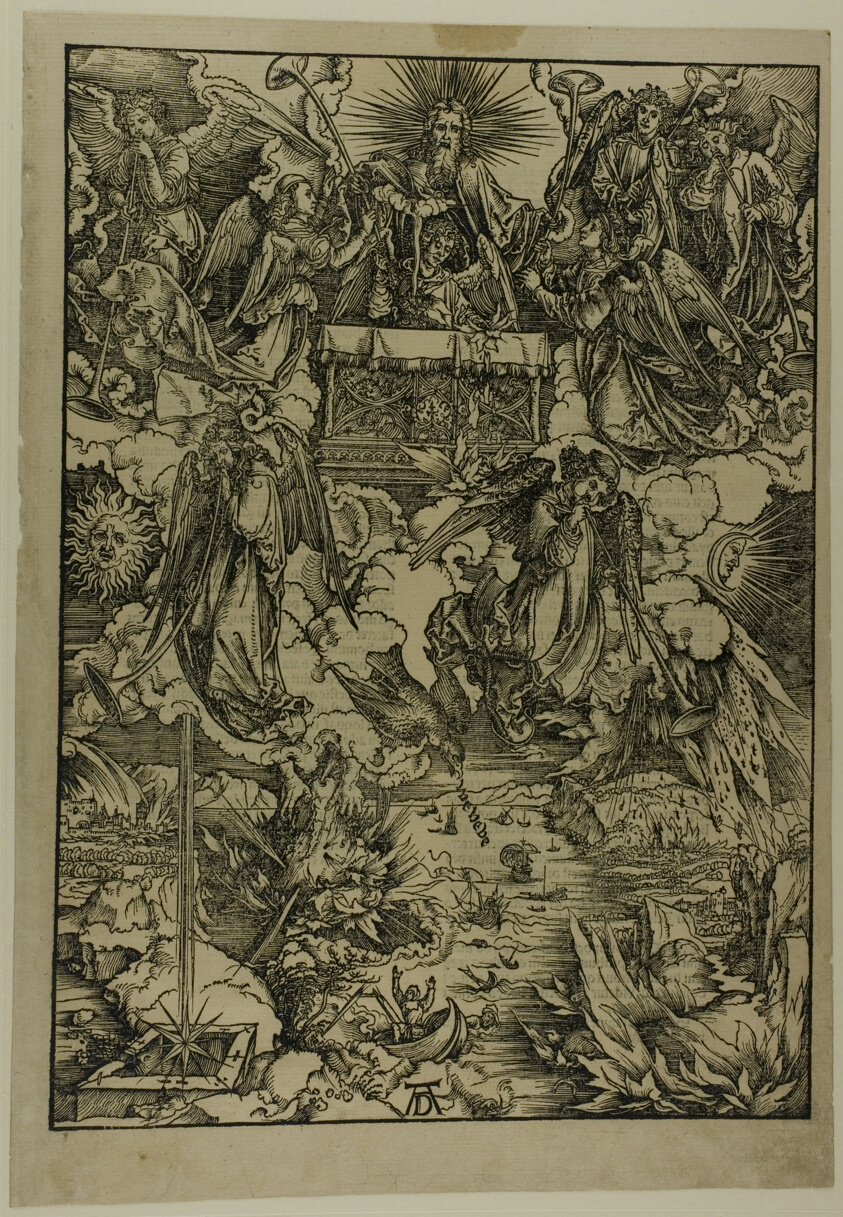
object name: Print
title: The Seven Trumpets, from The Apocalypse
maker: Albrecht Dürer (German, 1471-1528)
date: c. 1496–98, published 1511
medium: Woodcut in black on tan laid paper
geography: Germany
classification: woodcut; print; prints and drawing; paper